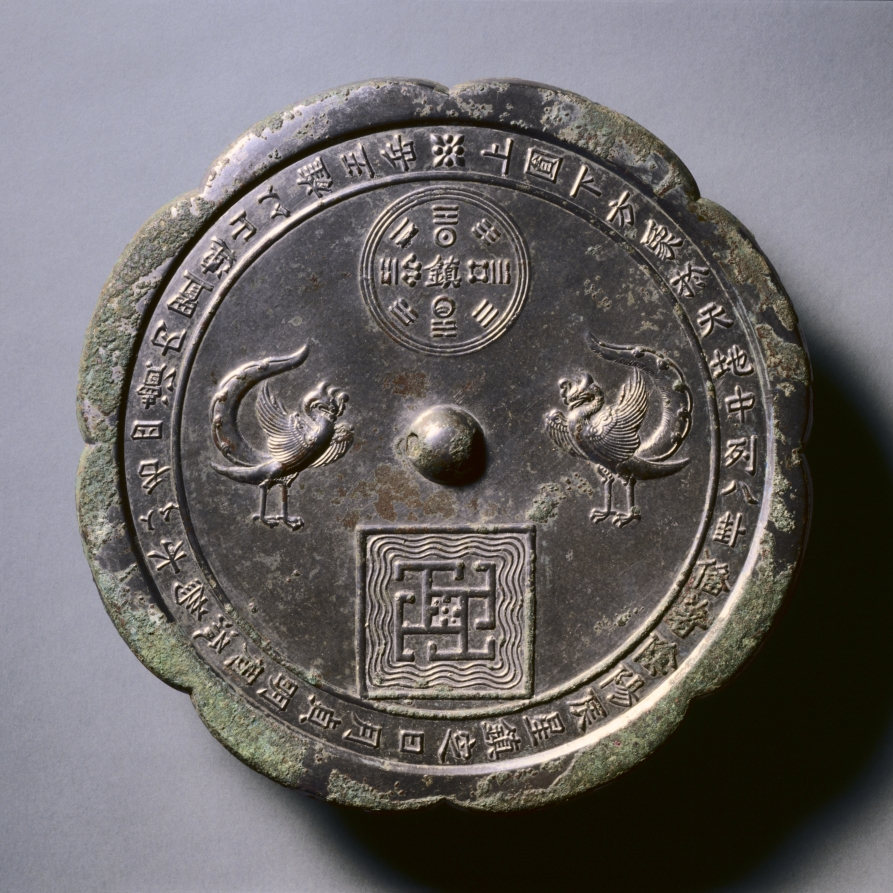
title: Lobed Mirror with Heaven and Earth between the Paired Phoenixes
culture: China, Tang dynasty (618-907)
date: mid to late 700s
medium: bronze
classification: Metalwork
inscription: 上圓下方，象于天地。 中列八填，備著陰陽。 辰星鎮定，日月貞明。 周流為水，以名四瀆。 內置連山，以旌王岳。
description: This mirror bears an important inscription as well as symbolic imagery of the Eight Trigrams and Heaven and Earth to express the ancient Chinese cosmological ideas. The inscription reads: Circle above and square below: These are symbolic of heaven and earth. In the middle are the Eight Trigrams. Making clear [the forces of] yin and yang. Stars and constellations are well aligned; The sun and the moon are virtuous and bright. Circulating around [the earth] is water, Giving identity to the Four Great Rivers. Within are the mountain ranges, To signify the lordly heights.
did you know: This mirror contains cosmological symbolism with heaven represented by a large circle at top and earth by a square at bottom.